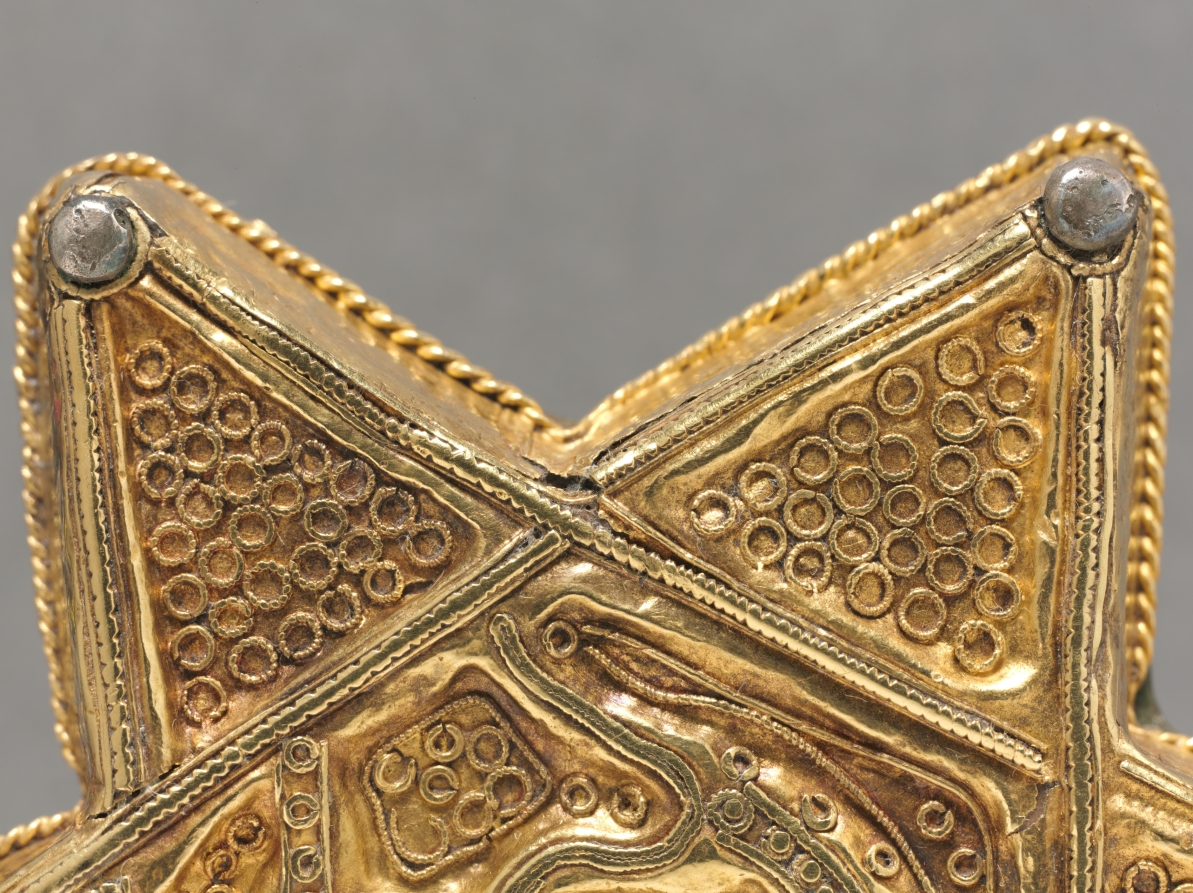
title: Brooch in the Form of a Six-Pointed Star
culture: Frankish, early Carolingian, late 8th century - early 9th century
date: late 700s-early 800s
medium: gold with repoussé and filigree decoration; copper backplate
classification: Metalwork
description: Women used brooches like this to fasten their veils beneath the chin. Its rare form--a hexagram--suggests that it also functioned as a talisman or amulet to attract good luck and to ward off evil.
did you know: Look carefully at this brooch and notice a small animal, perhaps a dragon, camouflaged amid the swirling whirls of gold.